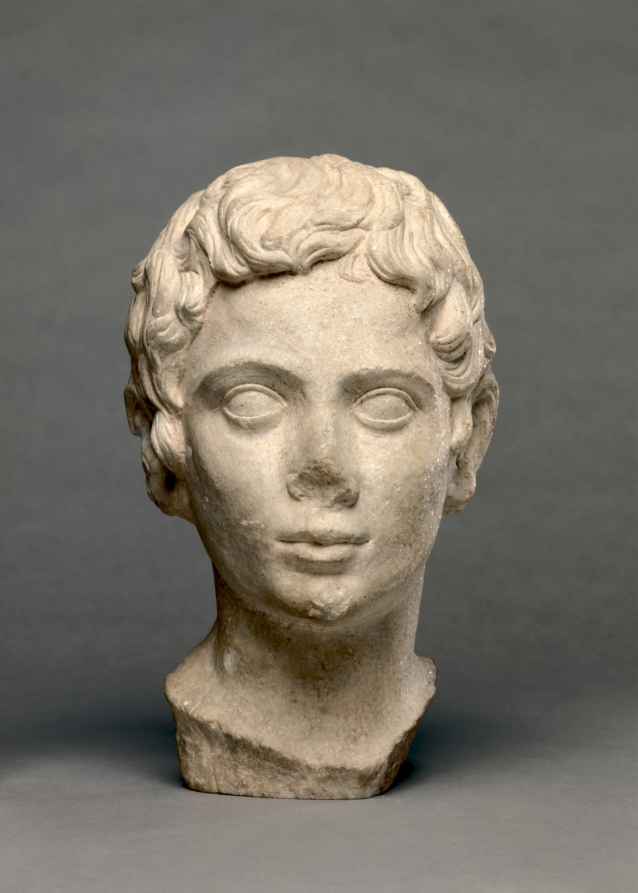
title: Portrait Head of a Youth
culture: Egypt, Alexandria, Roman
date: 1–100 CE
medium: marble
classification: Sculpture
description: Several unusual features of this head suggest that its carving was never finished in antiquity. These include unfinished hair around the ears, small bumps remaining in the hair near the front and top of the head, and the lack of a finely polished surface. Although said to have been found in Egypt, the head is carved of dolomitic marble thought to come from the Saliari region of the northern Greek island of Thasos.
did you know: The carving of this head was never finished.